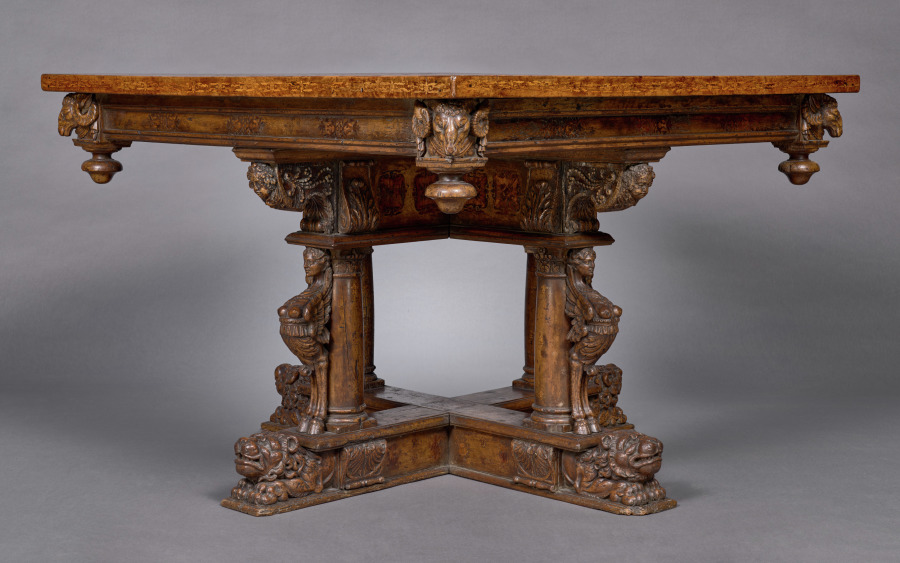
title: Inlaid Table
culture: France, Burgundian School, 16th century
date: 1550–1599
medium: walnut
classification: Furniture and woodwork